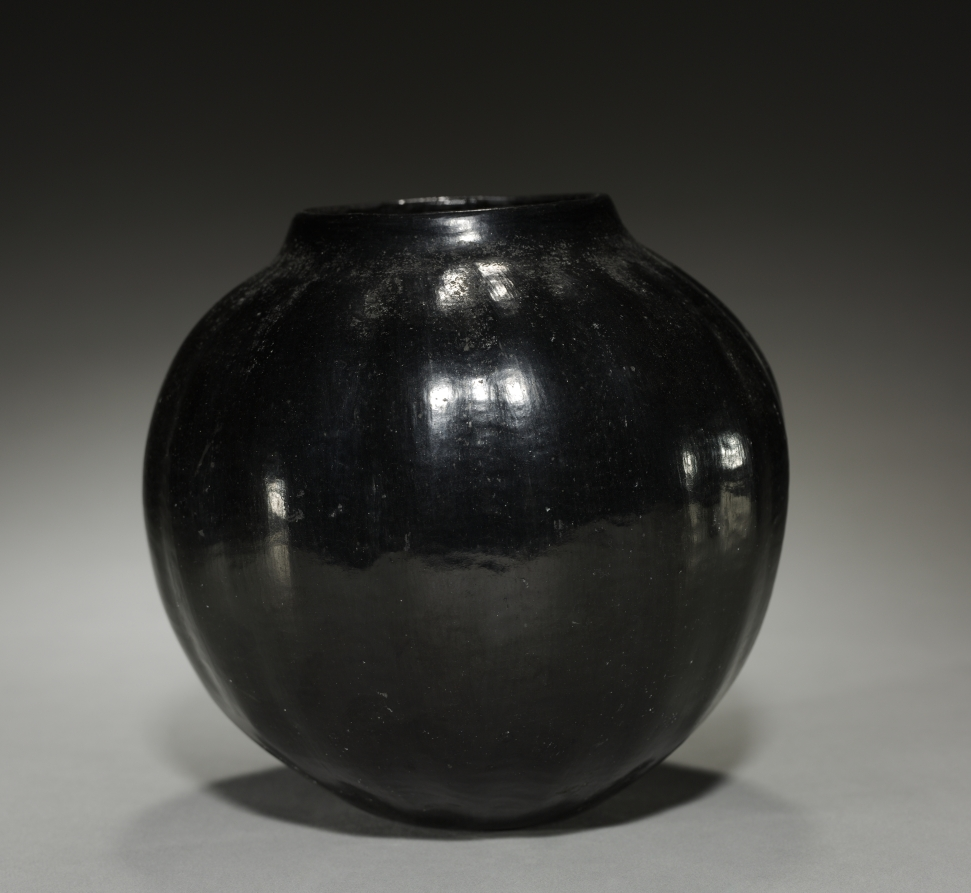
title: Pumpkin-shaped Jar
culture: Southwest, Santa Clara Pueblo, 20th century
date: c. 1900– 1925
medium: black ware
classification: Ceramic